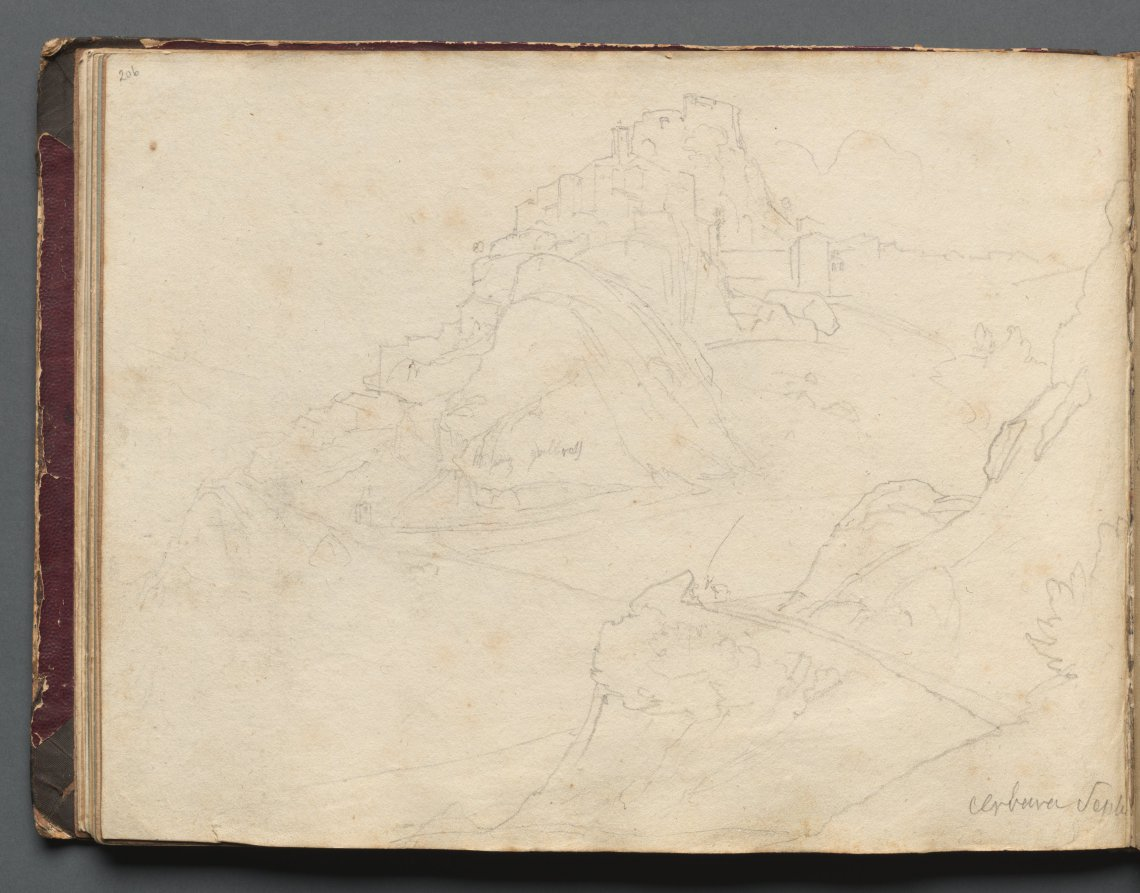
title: Album with Views of Rome and Surroundings, Landscape Studies, page 20b: "Cervera"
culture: Germany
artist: Franz Johann Heinrich Nadorp (German, 1794–1876)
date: c. 1830s-70s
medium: graphite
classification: Bound Volume